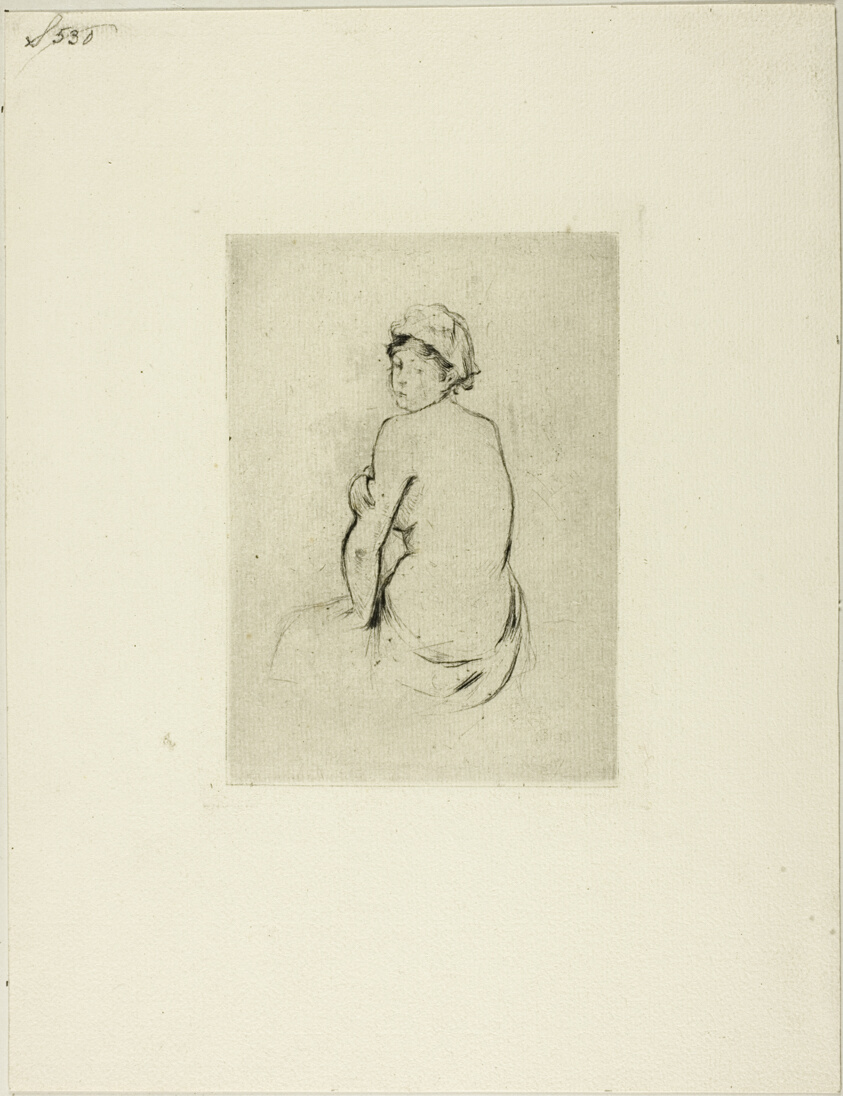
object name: Print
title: Nude Seen from Behind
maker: Berthe Morisot (French, 1841-1895); printed by Ernest Rouart (French, 1874-1942)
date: 1889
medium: Drypoint on cream laid paper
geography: France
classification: drypoint; print; prints and drawing